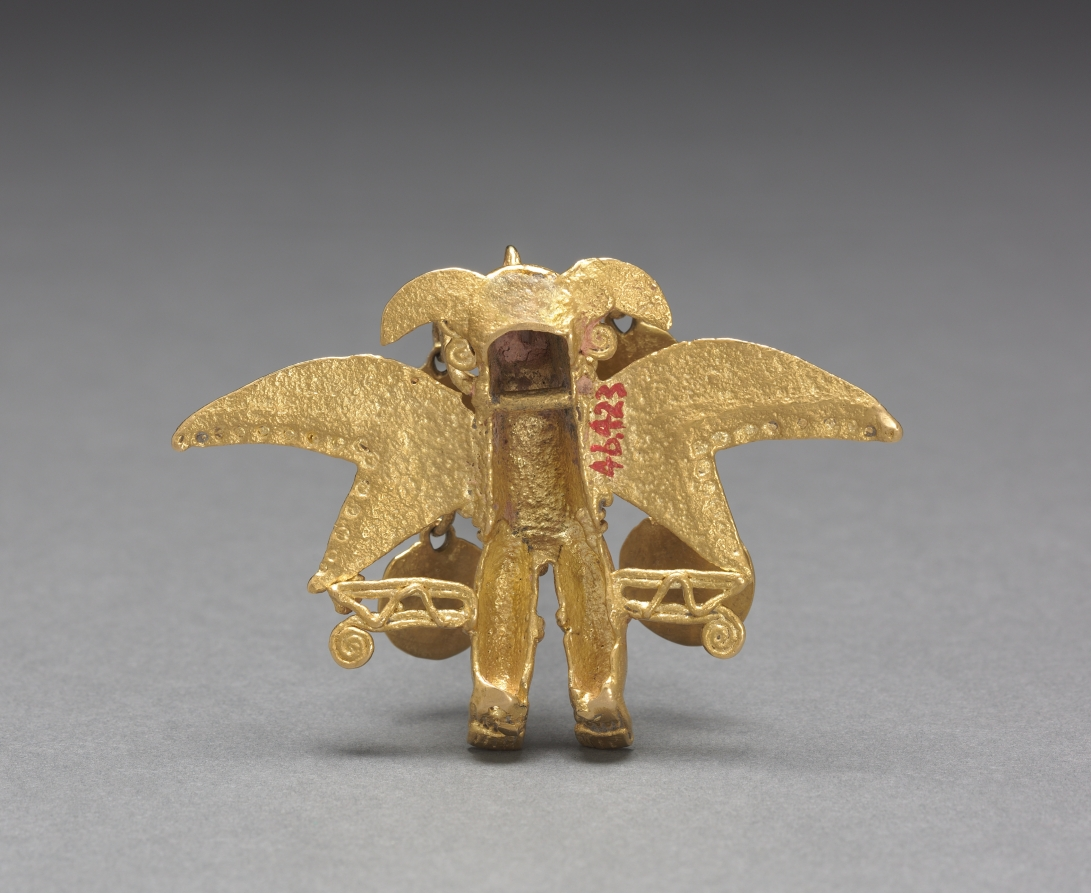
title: Winged Figure Pendant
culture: Southern Costa Rica, (Diquís Region), Diquís Style, 11th-16th century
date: c. 1000–1550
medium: cast and hammered gold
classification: Metalwork